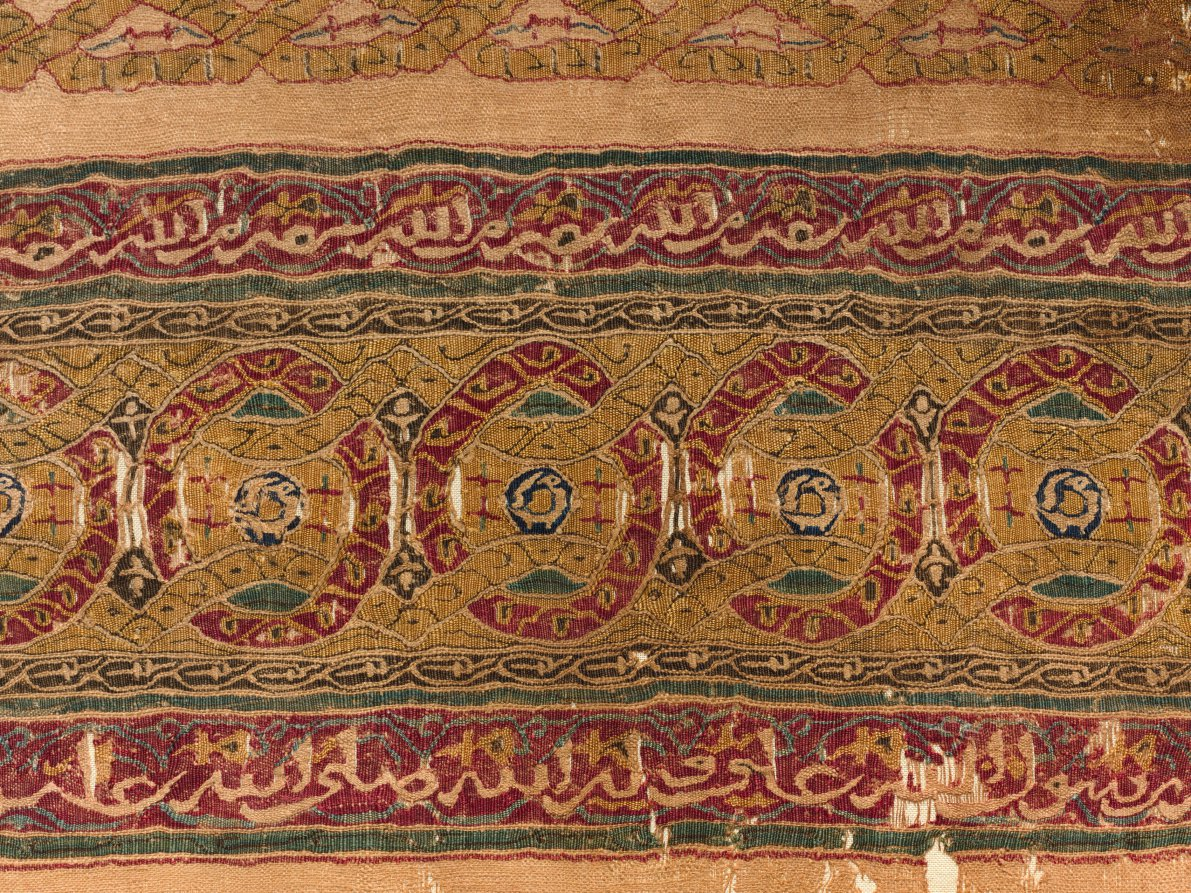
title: Tiraz with guilloche bands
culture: Egypt, Fatimid period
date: 1100s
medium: plain weave with inwoven tapestry weave: linen and silk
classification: Textile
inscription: the top inscription band consists of a repetition over and over of the words: "nasr min Allah (victory is from God.)" The lower inscripton band reads: "Bism Allah al-rahman al-rahim la ilaha illa Allah wahdahu la sharik lahu 'izz min Allah nasr min Allah nasr min Allah barakah Muhammad rasul Allah 'Ali wali Allah sallá Allah 'alayhim[a. . . (In the name of God the merciful, the Compassionate. There is no god but God along; there is no one associated with Him. Glory is from God. Victory is from God. Victory is from God. Blessing. Muhammad is the apostle of God; Ali is the true friend of God, may God bless the[m. . .]."